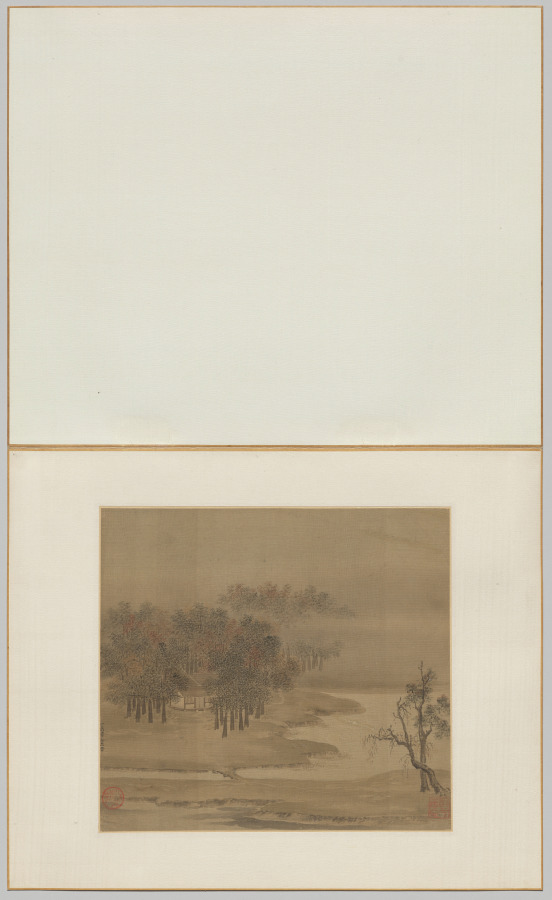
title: Cottages in a Misty Grove in Autumn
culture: China, Northern Song dynasty (960-1127)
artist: Li Anzhong (Chinese, active first half of the 1100s)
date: 1117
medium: Album leaf; ink and color on silk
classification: Painting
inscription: Artist's inscription: In the ting-yu year [1117], Li An-chung painted. 2 seals of Wu T'ing (ca. 1600).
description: This leaf is an early example of a new mode in landscape painting expressed in vistas of water-rich scenery that developed since the 900s. Li Anzhong, a court artist during the 1100s, witnessed the transition of the capital from Kaifeng across the Yangzi River to Hangzhou.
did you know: This painting showcases a delicate painting technique and an intimate view.